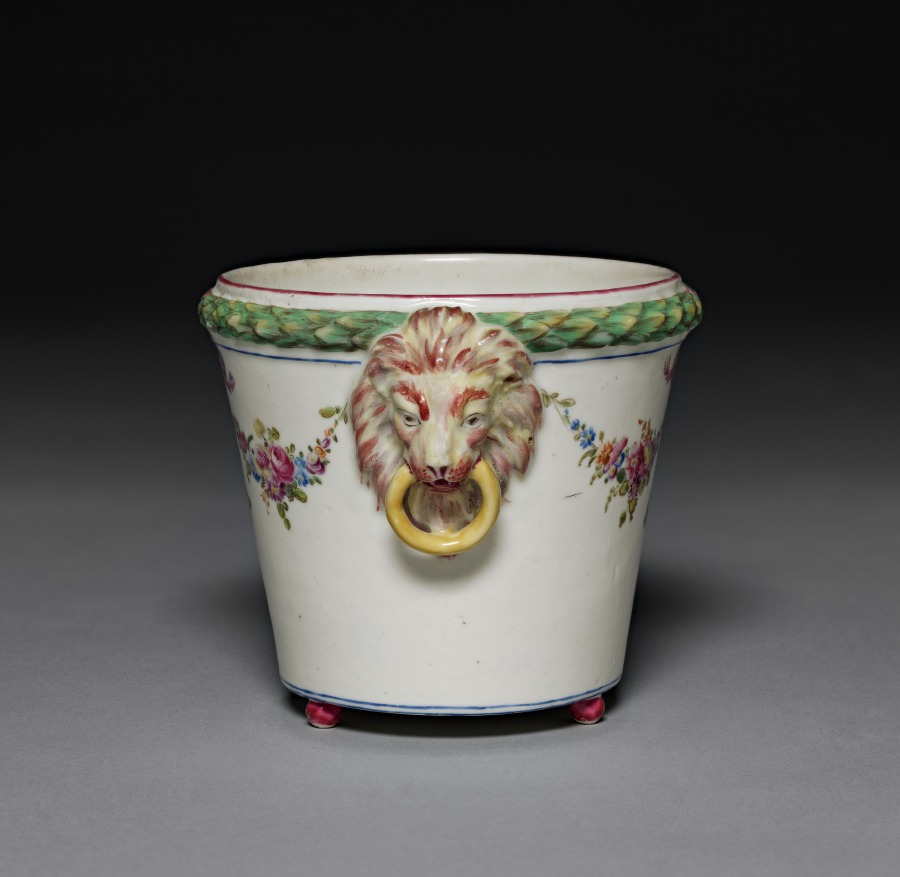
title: Cachepot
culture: France, Bourg-la-Reine, 18th century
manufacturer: Bourg-la-Reine Factory (French)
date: c. 1775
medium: soft-paste porcelain with enamel decoration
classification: Ceramic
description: The mark on this piece indicates that it was made after the Mennecy factory was moved to Bourg-la- Reine in 1773. The tradition of Mennecy's decoration on soft-paste porcelain can be recognized in the piece, but its style has been modified in response to the emerging neo-classic taste. The flowers are now organized into formal garland's and motifs of classical origin, such as the lion's heads, are introduced.